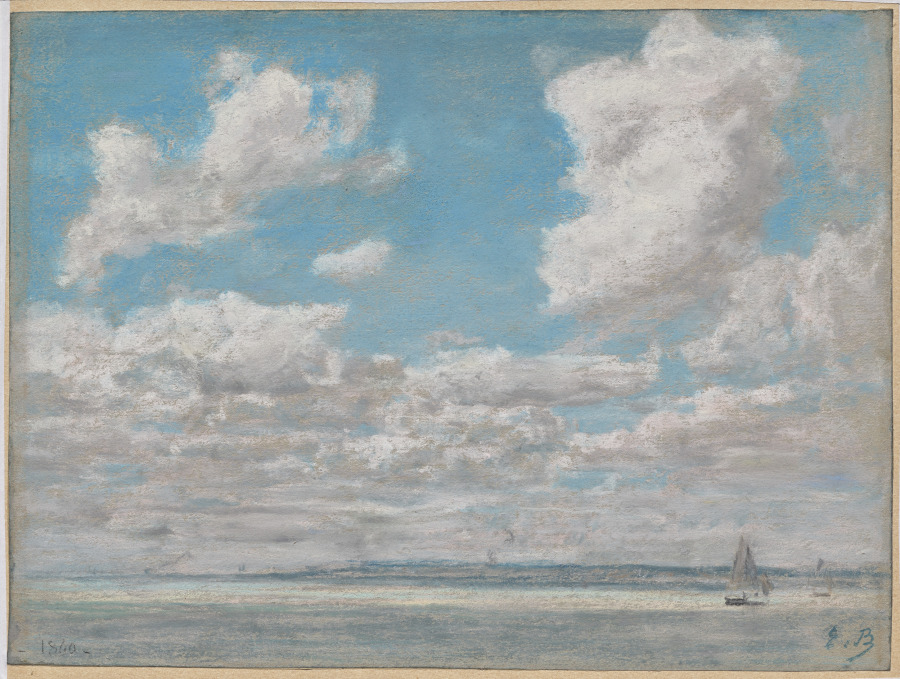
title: Seascape with Open Sky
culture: France, 19th century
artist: Eugène Boudin (French, 1824–1898)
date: 1860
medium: pastel on gray wove paper mounted on thin paperboard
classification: Drawing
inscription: inscribed, lower left, in black chalk: - 1860 -; stamped, lower right, in blue ink: artist’s stamp [Lugt 828]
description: Eugène Boudin is best known for inspiring Impressionist artists, especially a young Claude Monet, to paint outdoors. This drawing belongs to a series that Boudin made throughout much of his career depicting seascapes with dramatic skylines onsite. He favored pastel, the powdery medium used here, for its portability and directness, allowing him to capture the dramatic effects of nature as they shifted.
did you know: The well-known Parisian critic and writer Charles Baudelaire singled out Eugène Boudin's seascape pastels in a review published around the time this work was made, describing them as characterized by "meteorological beauty."